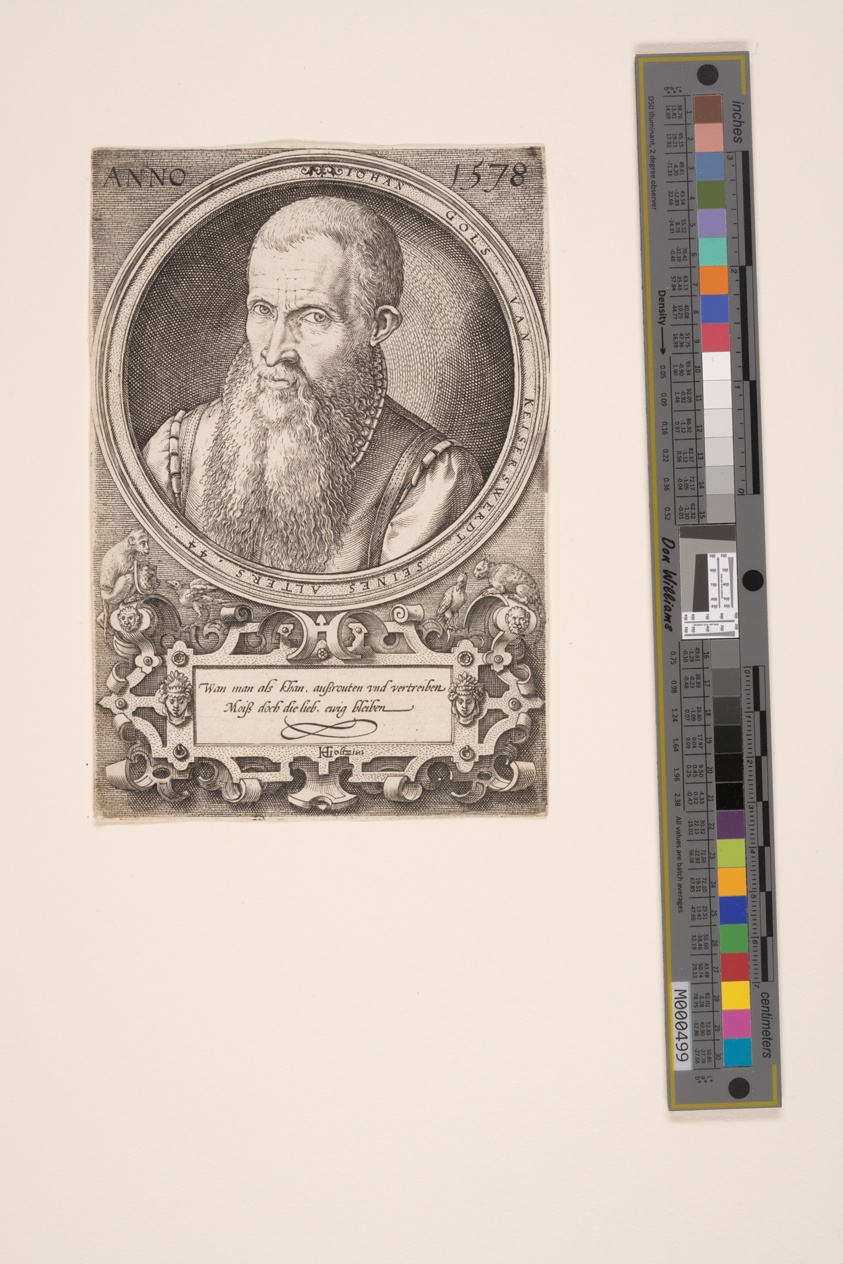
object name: Print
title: Jan Goltz II, Father of the Artist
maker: Hendrick Goltzius (Dutch, 1558–1617)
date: 1578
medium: Engraving on laid paper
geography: Netherlands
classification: engraving; paper; print; prints and drawing